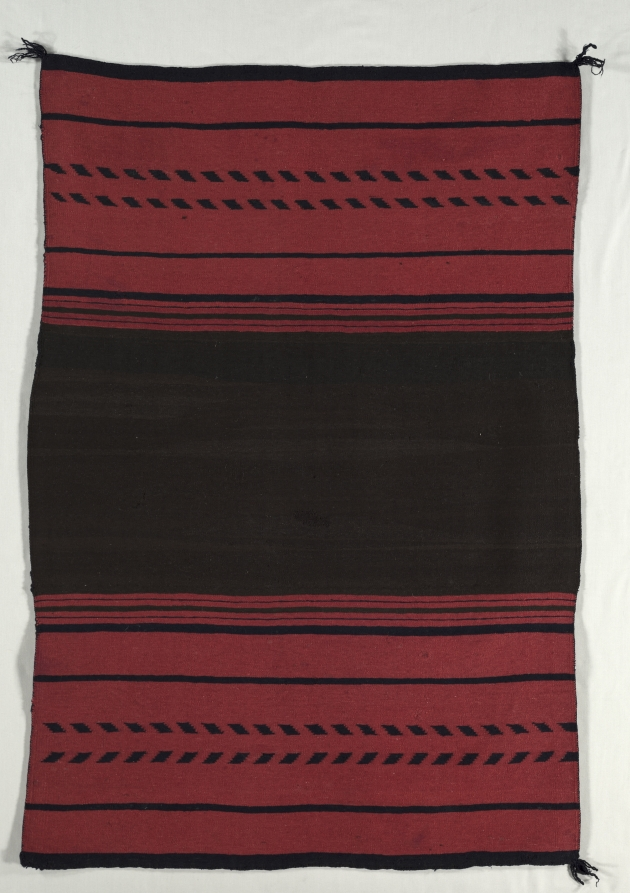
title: Woman's Dress (one panel)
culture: America, Native North American, Southwest, Navajo, Post-Contact, Late Classic Period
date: c. 1870s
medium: tapestry weave: wool (handspun and bayeta)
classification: Textile